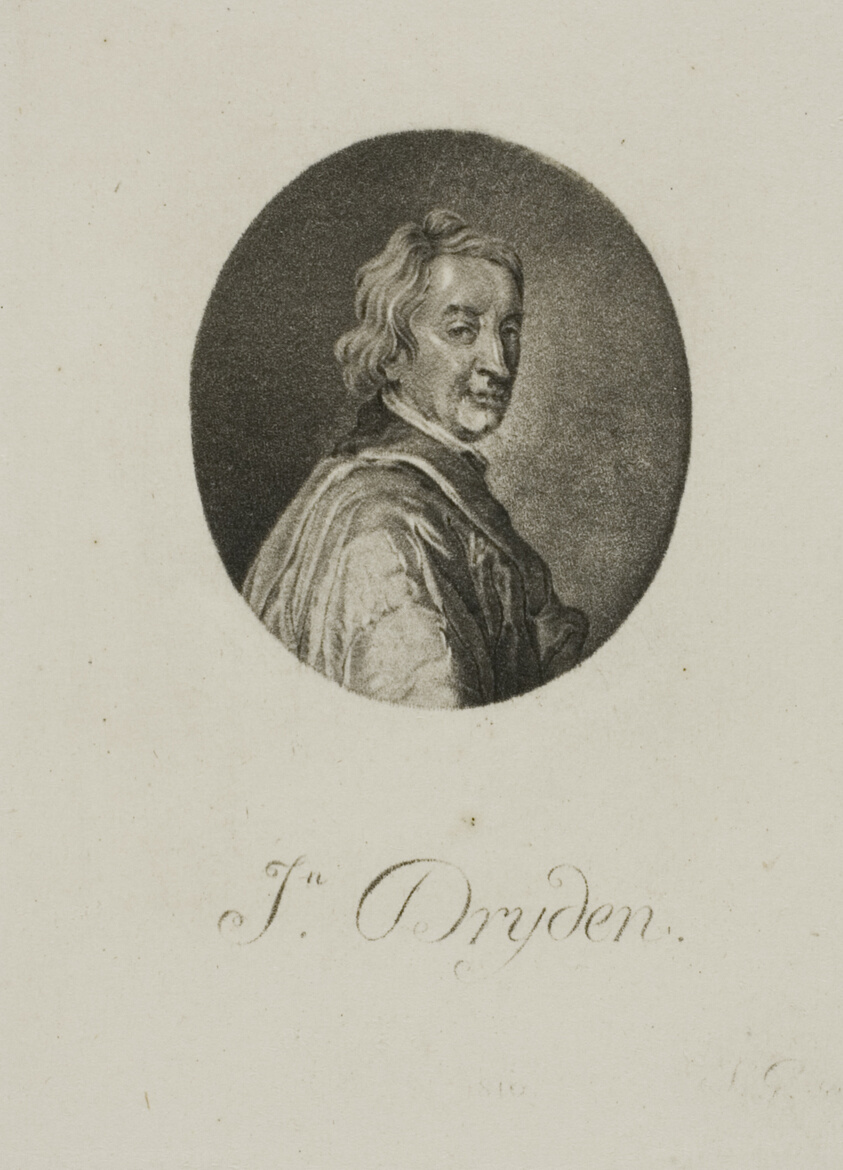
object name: Print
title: John Dryden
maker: Jean-Baptiste de Grateloup (French, 1735-1817); Jean Pierre Sylvestre (French)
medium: Engraving on paper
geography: France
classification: aquatint; print; prints and drawing